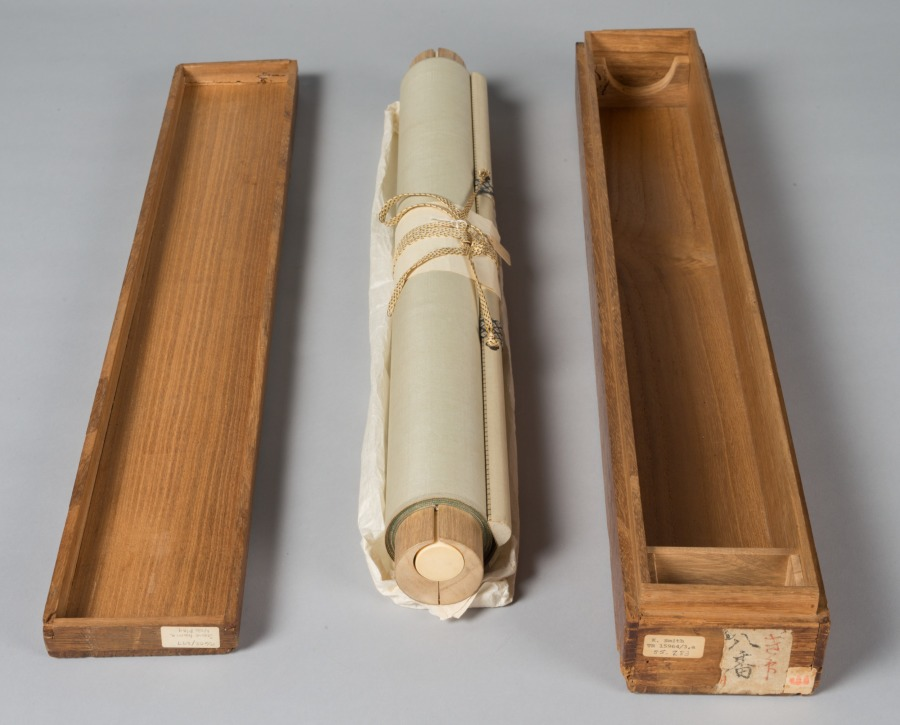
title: Scene from a Noh Play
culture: Japan, Edo period (1615–1868)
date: early 1700s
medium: hanging scroll; ink, color, and gold on paper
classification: Painting